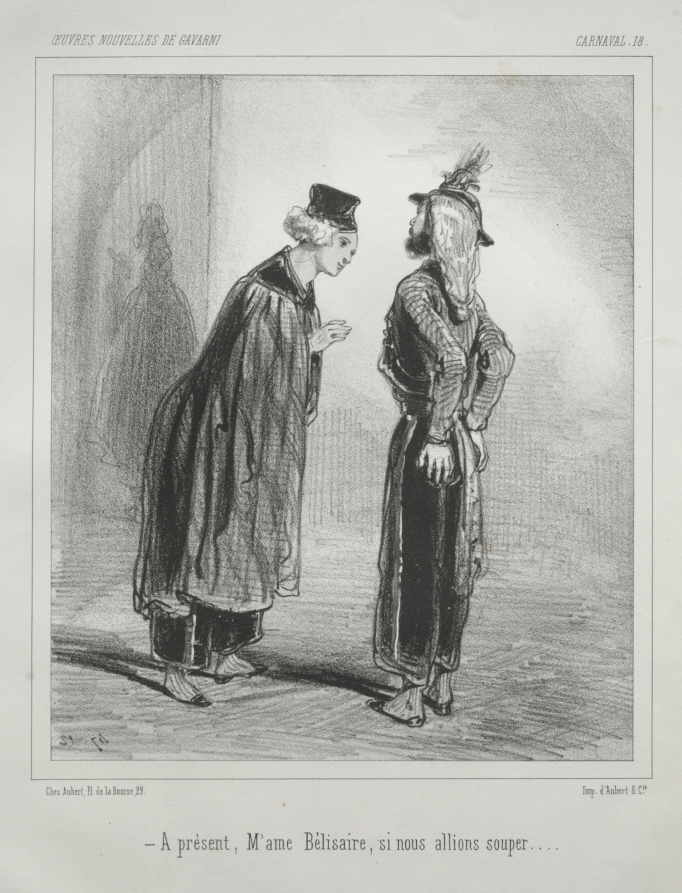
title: Carnaval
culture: France, 19th century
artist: Paul Gavarni (French, 1804–1866)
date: c. 1841–47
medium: lithograph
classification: Print